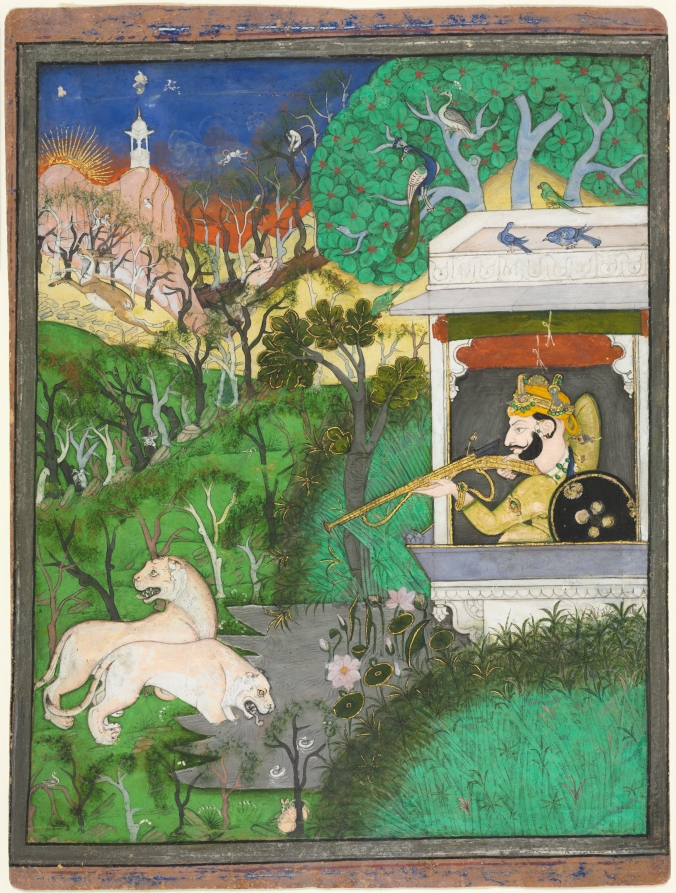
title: Maharaja Chattarsol of Kota Shooting Lions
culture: Northwest India, Rajasthan, Rajput Kingdom of Kota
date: c. 1860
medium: Gum tempera, ink, and gold on paper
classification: Painting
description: The trope of a royal marksman shooting at a pair of lions drinking at a pond extended into the second half of the 1800s at the Kota court. This suggests that earlier examples of this theme were prized and remembered for generations. By the time this painting was made, artists had access to synthetic pigments that were developed in the West, and more brilliant blues and greens distinguish a work such as this from its predecessors.